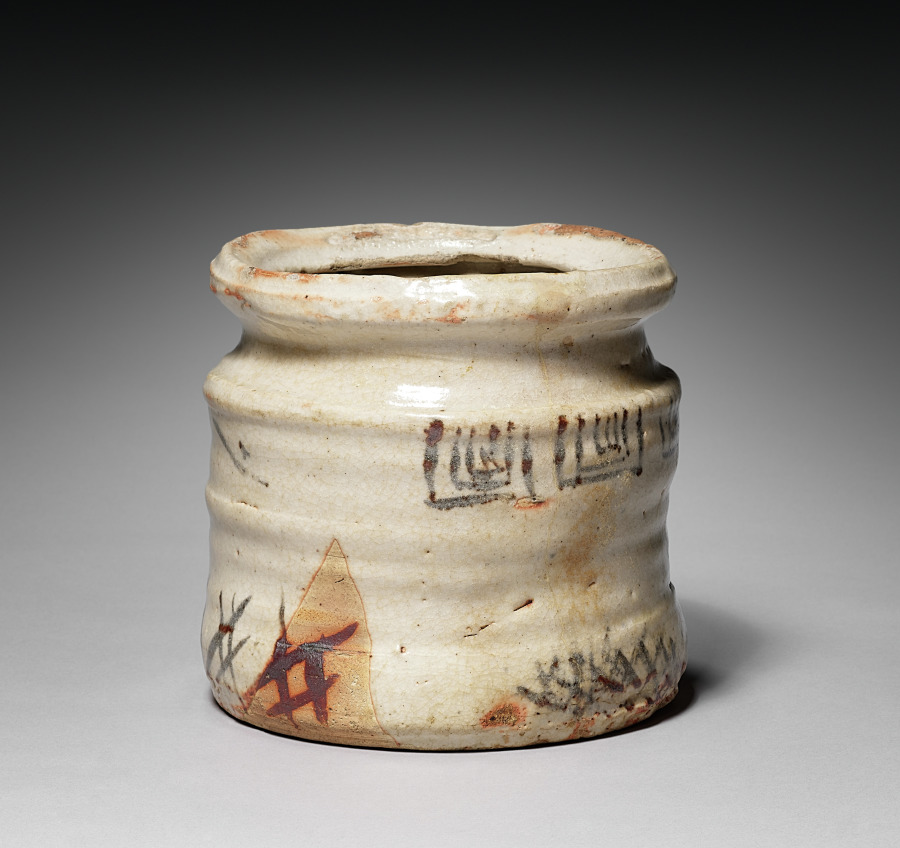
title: Water Container (Mizusashi) with Riverscape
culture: Japan, Momoyama period (1573-1615) to Edo period (1615-1858)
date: late 1500s–early 1600s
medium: Stoneware with underglaze iron oxide slip decoration (Mino ware, Shino type)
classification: Ceramic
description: Mizusashi are jars used to hold water for the preparation of tea at tea gatherings. This one was produced in the Mino area of present-day Gifu prefecture in central Japan, and is considered one of the finest of its type in existence, based on the complex aesthetic sensibilities developed around the tea ceremony in Japan. It is called a “picture Shino” (e-shino) mizusashi, as it has an abstracted design said to resemble an ink painting of reeds along a river bank and small boats in a river on one side, and a geometric pattern on the other. With its irregular shape and thick, luminous glaze, it is of a variety favored by eminent tea masters of the Momoyama period.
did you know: The water this container held during a tea ceremony was used to fill the kama, or iron pot in which the water is heated.